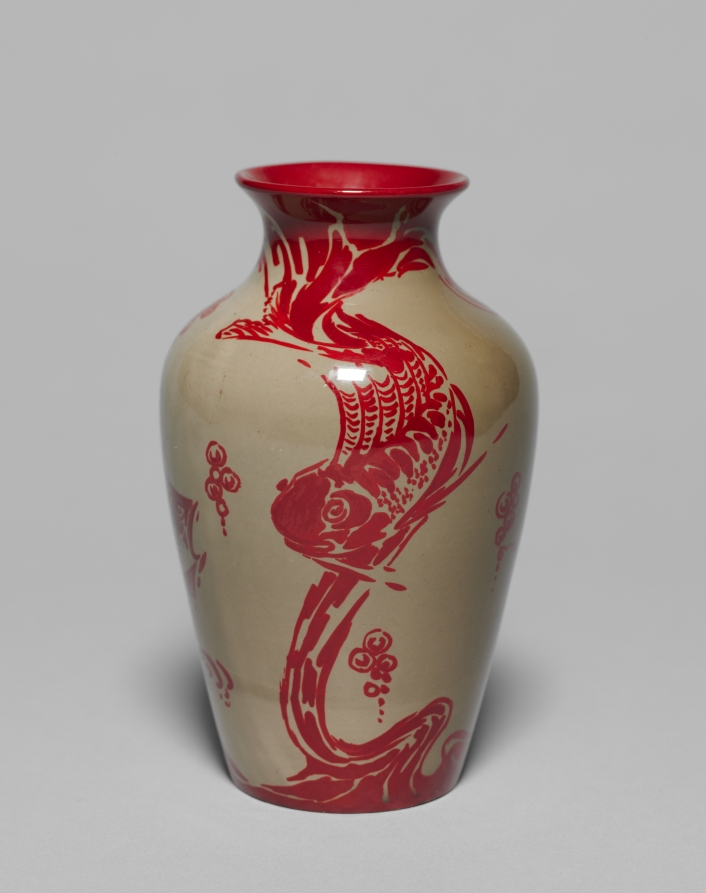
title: Vase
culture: England, 20th century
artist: Bernard Moore (British, 1850–1935)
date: c. 1900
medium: porcelain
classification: Ceramic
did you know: The designer Bernard Moore studied Asian and Islamic ceramics. He was especially interested in glazes like the vivid red one on this vase that resembles the color of oxblood.